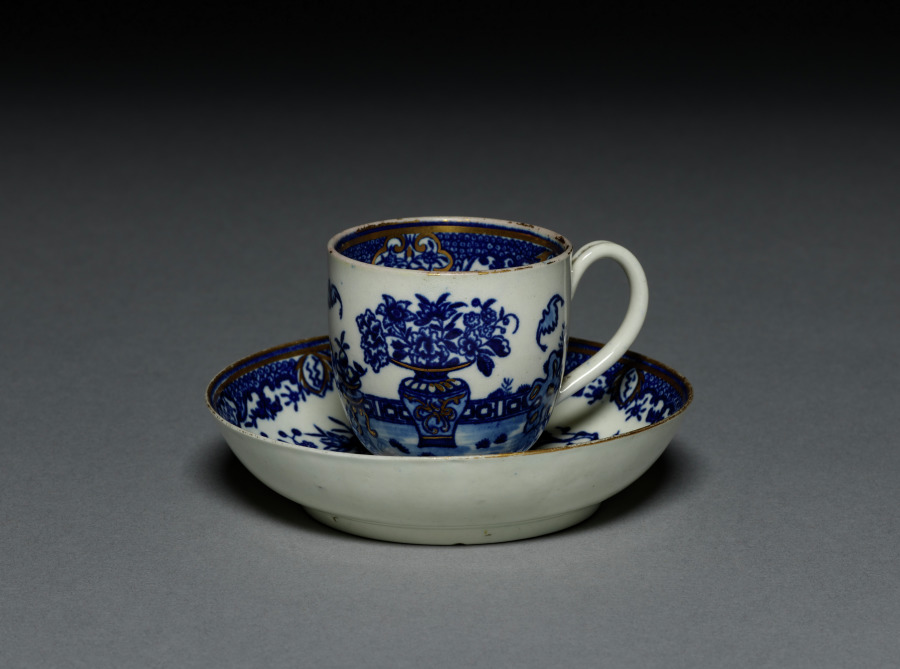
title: Cup and Saucer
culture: England, 18th century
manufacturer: Worcester Porcelain Factory (British, established 1751)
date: 1760–80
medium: porcelain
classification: Ceramic